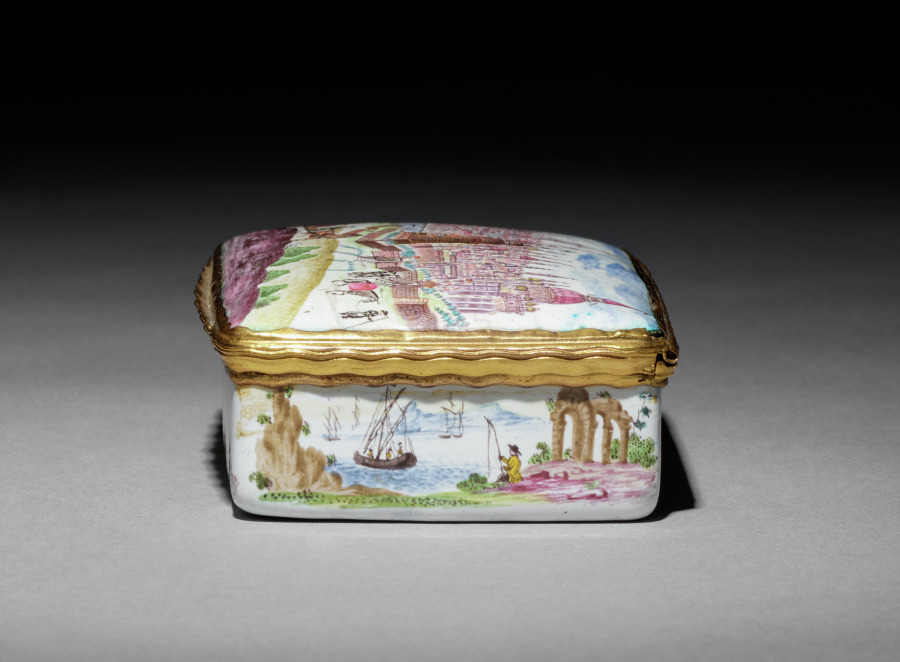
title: Snuff Box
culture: Austria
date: c. 1750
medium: enamel on copper with metal mounts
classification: Miscellaneous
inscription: on top there are a number of inscriptions in black: "Roma," "Trevere R," "C:ST: Ang" (for Castello San Angelo), "S: Pe:" (for San Pietro), "S.G.L." (probably for San Giovanni Laterano). on interior of lid: "WIENNE."